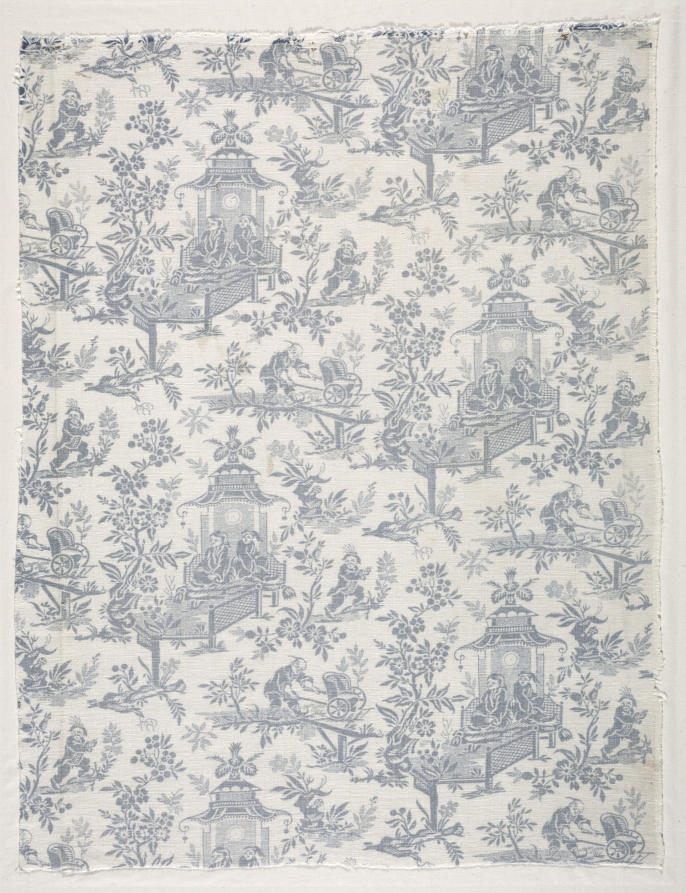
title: Fragment of Woodblock Printed Cotton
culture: France, Jouy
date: c. 1770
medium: woodblock print on cotton and linen mixed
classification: Textile